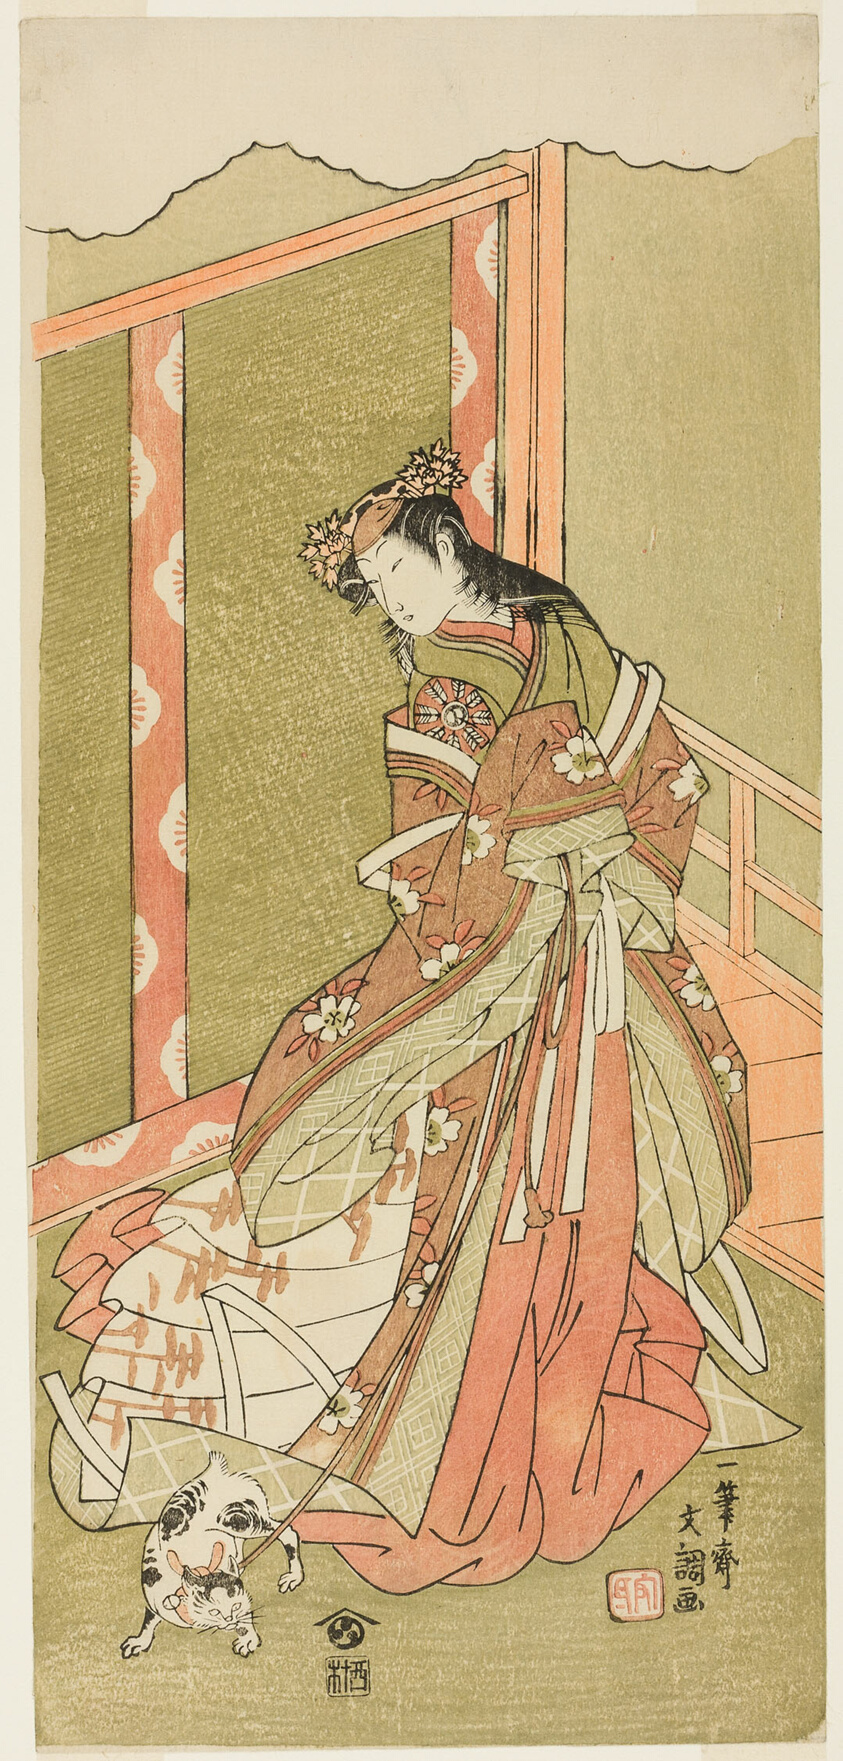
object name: Print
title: The Actor Nakamura Noshio I as the Third Princess (Nyosan no Miya) in the Play Fuki Kaete Tsuki mo Yoshiwara (Rethatched Roof: The Moon also Shines Over the Yoshiwara Pleasure District), Perfromed at the Morita Theater from the First Day of the Eleventh Month, 1771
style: Japanese (culture or style)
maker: Ippitsusai Buncho (Japanese, active c. 1755-90)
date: c. 1771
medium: Color woodblock print; hosoban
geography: Japan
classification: woodblock print; print; asian art